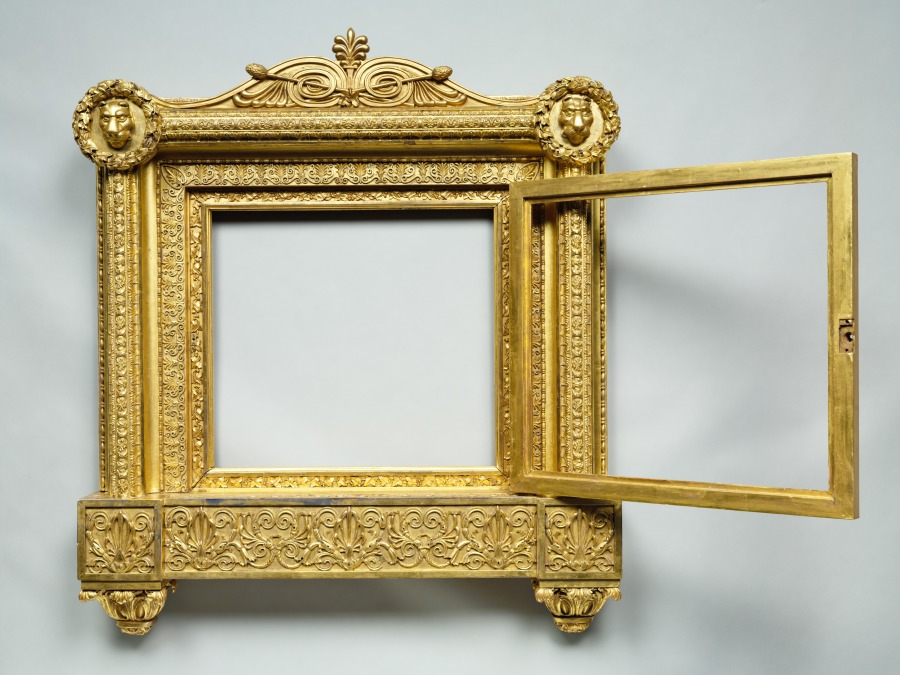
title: Bacchus and Ariadne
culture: England, 19th century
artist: Henry Bone (British, 1755–1834)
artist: after Titian (Italian, c. 1488–1576)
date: 1808–11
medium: enamel, in original gilt-wood and gesso carved frame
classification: Miniature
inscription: Signed and dated H Bone, 1811 on the recto (on the urn, lower left), inscribed on frame mat at bottom right: ENAMEL HBONE, and signed, dated and inscribed in full on the counter-enamel "painted by Henry Bone R.A. Enamel painter in Ordinary to His Majesty and Enamel painter to His Royal Highness the Prince of Wales, after the Original by Titian in the Collection of the Rt: Honble: Lord Kinnaird &c &c &c.____ This Picture the most celebrated amongst the Bacchanalian Subjects of Titian (when patronis'd by Alphonso Duke of Ferrara) was ultimately brought to this Country from the Villa Aldobrandini in Rome in 1806, from whence it was imported by Willm. Buchanan Esq.____ Size of the Original 6 feet 2 inches, by 5 ---- 10 ---- This Enamel picture w[as] began July 30th 1808 and finish'd March 1811. ___ (HB. Elected a Royal Academician Feby. 11th 1811)"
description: Henry Bone devoted three years to creating this work, a tremendous technical achievement and the largest enamel on copper that had ever been made. The painstaking process required each application of color to be fired at a different temperature in the kiln. The enamel exactly reproduces Titian’s Bacchus and Ariadne (now in the National Gallery, London), an early sixteenth-century Italian masterpiece that had recently come into an English collection. The elaborate carved and gilded wood frame was specially designed for the work, an indication of the cultural value placed on great enamel reproductions of famous paintings. Bone was unable to show his masterwork at the annual Royal Academy exhibition in 1811 because the Prince of Wales had asked to see it. When the prince decided not to purchase it, Bone issued more than 4,000 tickets for visitors to view the work in his studio.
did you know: Henry Bone was known for his enamel paintings created through a laborious process of fusing painted glass to copper and firing at controlled temperatures.